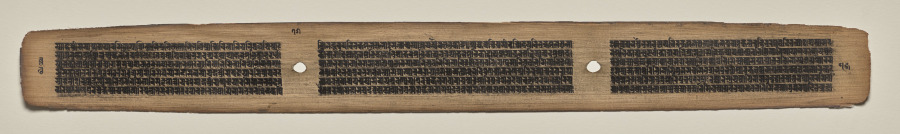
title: Text, Folio 75 (verso), from a Manuscript of the Perfection of Wisdom in Eight Thousand Lines (Ashtasahasrika Prajnaparamita-sutra)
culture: Eastern India, Bihar, Vikramashila Monastery. Painting: Nepal, Kathmandu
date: Sunday, September 14, 1119 (year 239 of the Newar Samvat in the month of Ashvina)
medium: gum tempera and ink on palm leaves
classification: Painting